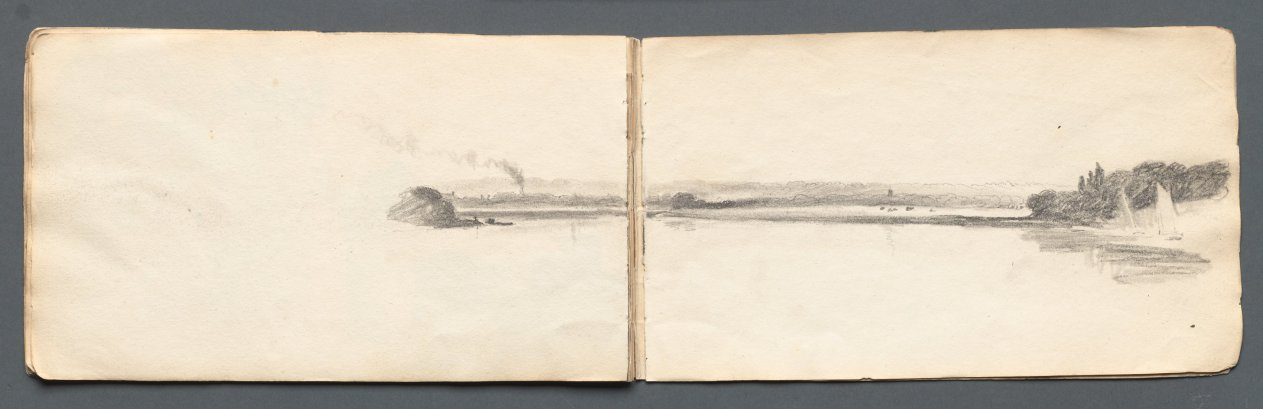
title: Sketchbook: "Landscape with Sailboats"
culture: England, 19th century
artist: Samuel Prout (British, 1783–1852)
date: 1814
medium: graphite on two pages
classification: Bound Volume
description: John Ruskin (also in this gallery) admired Prout’s strength as a draftsman. Like the topographical watercolorists of the 18th century, Prout emphasized form over color in his watercolors, as is evident in the monochromatic, delicate English views in this sketchbook.